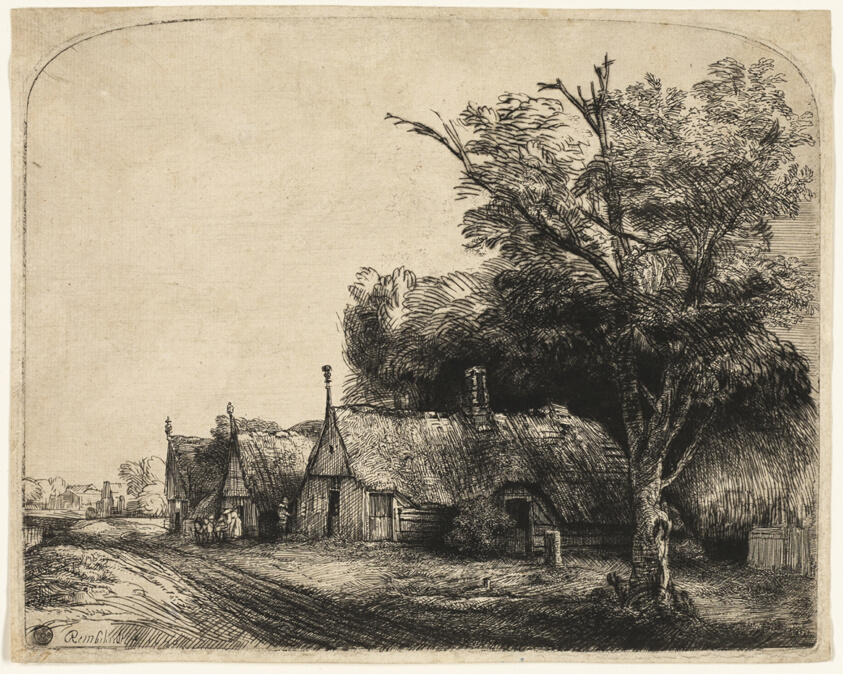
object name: Print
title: Landscape with Three Gabled Cottages Beside a Road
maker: Rembrandt van Rijn (Dutch, 1606-1669)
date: 1650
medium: Etching and drypoint in black on cream laid paper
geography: Holland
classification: etching; print; prints and drawing; paper; drypoint